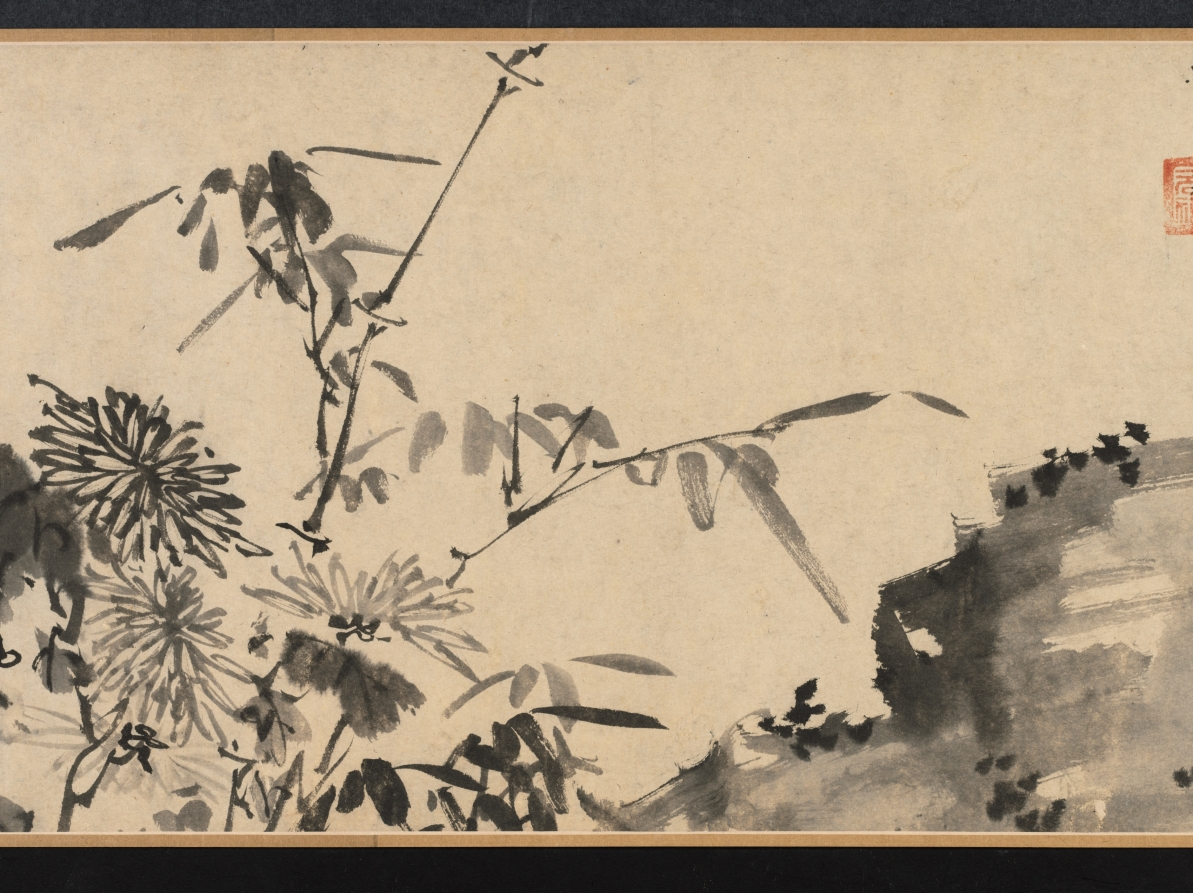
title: Chrysanthemums and Cabbage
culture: China, Ming dynasty (1368–1644)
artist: Tao Cheng (Chinese, active c. 1471–after 1502)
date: c. 1486 or before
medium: handscroll, ink and slight color on paper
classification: Painting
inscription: Artist's seal at beginning of painting: Yun hu 雲湖. Title by Wang Wenzhi 王文治 (1730–1802), date 1756. 2 seals of Wang Wenzhi 王文治 (1730-1802); 3 seals of Ku Yün (n. d.)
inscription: Section A (Chrysanthemums): 1 poem and 1 seal of Zhang Yuanzhen 張元禎 (1437–1507) - Jinshi, 1461; 1 poems and 3 seals of Ni Yue 倪岳 (1444–1501) - Jinshi, 1464; 1 poems and 2 seals of Zhao Xiang 趙祥 (life dates unknown) - Jinshi, 1469; 1 poems and 1 seals of Wu Xixian 吳希賢 (1437–1489) - Jinshi, 1464; 1 poems and 1 seals of Lü Chang 呂㦂 (1449–1511) - Juren, 1471; 1 poems and 3 seals of Fu Han 傅瀚 (1435–1502) - Jinshi, 1464; 1 poems and 1 seals of Feng Jue 馮珏 (life dates unknown) - Jinshi, 1478.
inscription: Chrysanthemums section, poem 1, by Zhang Yuanzhen 張元禎 (1437–1507): Several bushes of chrysanthemums grow in front of the Five-Willow Cottage,/ The yellow ones are really yellow and the white ones white./ This affable and decent fellow, young in years and unsophisticated,/ Has snapped one of the branches to dip in ink. (The Five-Willows Cottage was the home of the poet Tao Qian 陶潛 (Tao Yuanming 陶淵明, AD 365-427).) Chrysanthemums section, poem 2, by Ni Yue 倪岳 (1444–1501): Where at the Eastern Fence can you grieve for the Soul of the Xiang River?/ A man of upright character is mourned within the traces of ink./ White jade with a slight flaw would be a grievance forever,/ Later men should understand why even the roots of the flowers are washed. (Eastern Fence refers again to the poet Tao Qian 陶潛, while the Soul of the Hsiang River refers to the poet Qu Yuan 屈原 (c. 340–278 BC).) Chrysanthemums section, poem 3, by Zhao Xiang 趙祥 (life dates unknown): A clump of chrysanthemum grows in front of the bamboo pavilion,/ The winds of many autumns have blown since we parted beyond the river./ Straining wine through the official's cap of Tao [Qian] to prolong autumn's pleasures,/ The mists and clouds of ten thousand miles belong to the intoxicated. Chrysanthemums section, poem 4, by Wu Xixian 吳希賢 (1437–1489): It is a different spring if mulberry is planted during the latter part of the year,/ The dust of the world originally did not drop on clothing./ Who spills out ink under the Eastern Fence/ And paints so freely this portrait of chrysanthemums for the venerable Sir Tao? Chrysanthemums section, poem 5, by Lü Chang 呂㦂 (1449–1511): This full tray of ink for painting [flowers] at the Eastern Fence;/ Their whiteness or yellowness is not essential in capturing their beauty./ I don't have to go to Jiangnan to see them myself./ At my old house grow two or three branches. Chrysanthemums section, poem 6, by Fu Han 傅瀚 (1435–1502): Who daubed autumn flowers with ink/ As if they were dark dew on a branch tip only vaguely seen at evening?/ After the lazy clouds disperse, no one paints;/ A certain unconventionality pervades this painting. Chrysanthemums section, poem 7, by Feng Jue 馮珏 (life dates unknown): To satisfy his hunger, [the chrysanthemums] have at times entered the poetry of Qu Yuan;/ Taking up the wine cup, it felt close to Tao Qian./ [With them I am like] a lonely root sustained by deep water/ Or an old man to whose hair the color of youth returns.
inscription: Section B (Cabbage): 1 poem and 1 seal of Cai Qi 蔡圻 (life dates unknown) - degree information not known; 1 poems and 3 seals of Ni Yue 倪岳 (1444–1501) - Jinshi, 1464; 1 poem and 3 seals of Jiao Fang 焦芳 (1436–1517) - Jinshi, 1464; 1 poem and 3 seals of Li Dongyang 李東陽 (1447–1516) - Jinshi, 1464; 1 poems and 1 seals of Wu Xixian, signed “Xixian” 吳希賢 - Jinshi, 1464; 1 poems and 3 seals of Fu Han 傅瀚 (1435–1502) - Jinshi, 1464; 1 poems and 1 seals of Lü Chang 呂㦂 (1449–1511) - Juren, 1471; 1 poems and 2 seals of Zhao Xiang 趙祥 (life dates unknown) - Jinshi, 1469; 1 poems and 1 seals of Feng Jue 馮珏 (life dates unknown) - Jinshi, 1478.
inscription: Cabbage section, poem 1, by Cai Qi 蔡圻 (life dates unknown): The ink splashes are fresh from a frosty brush dipped in pond water;/ I can visualize that time when Yunhu 雲湖 [Tao Cheng] first showed his talents./ I lament the places where I scribbled before,/ Who would open them to inscribe a poem? (The first line is an allusion to the famous Jin dynasty calligrapher Wang Xizhi 王羲之 (AD 303-361), who practiced calligraphy so diligently at the edge of a pond that the water turned black with ink.) Cabbage section, poem 2, by Ni Yue 倪岳 (1444–1501): After rain the vegetables begin to grow;/ How are the colors of the masses lately!/ Once you get used to them, the tastiest parts are the ends of the roots;/ I don't know if they can be used for "seasoning soup." ("Seasoning soup" is an allusion to the statesmanship of a chief minister.) Cabbage section, poem 3, by Jiao Fang 焦芳 (1436–1517): This crop of purple stalks and green leaves is late and irregular;/ Now the rainy season is over for the Eastern Garden./ All the nobles nowadays dine on meat;/ Who of them knows the flavor of this [cabbage]. Cabbage section, poem 4, by Li Dongyang 李東陽 (1447–1516): It's always helped the honest man to sober up after drinks./ I intend to go to the deepest part of the stream-crossed garden/ To refresh myself in the fragrance and dew of evening. Cabbage section, poem 5, by Wu Xixian 吳希賢 (1437–1489): After rain, the white silk is filled with fragrant vegetables;/ How many times this happens in Mr. Tao's paintings./ On whom will you depend to present a memorial to the ruler?/ Don't let this color emerge on the faces of the people. (The last line is meant as a warning to officials: the color of the vegetables (green) may be pleasing in itself, but when it emerges on the faces of the starving poor, it signifies a badly governed world.) Cabbage section, poem 6, by Fu Han 傅瀚 (1435–1502): For twenty years I have feasted on the excellent mutton of an official;/ Yet I talk and dream about the garden and its vegetables./ Do not merely say it is good to chew the root of the cabbage--/ You must taste to understand what poverty is. Cabbage section, poem 7, by Lu Chang 呂㦂 (1449–1511): The capital is never a place for an apprentice in the "garden of scholarship."/ Who would write about gardens and vegetables on an examination paper?/ I've walked throughout the country in spring;/ Make sure the people don't show this color. Cabbage section, poem 8, by Zhao Xiang 趙祥 (life dates unknown): After a wash of rain, the spring garden is still in order;/ The flavor [of the cabbage] is more suitable with a small drink and the hum of a tune./ The rich and powerful in their mansions consume dish after dish of meat;/ Vegetarian food is known only by the scholars. Cabbage section, poem 9, by Feng Jue 馮珏 (life dates unknown): A new cabbage is nourished with dew;/ It takes a long time to grow and mature./ The business of "seasoning the soup" is your responsibility;/ Better command the gardener to take care [of the cabbages]. trans. HK/LYSL/WKH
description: On an autumn day in Beijing, Tao Cheng had a gathering with a group of scholar-officials and created two paintings in a spontaneous, casual style. The first depicts chrysanthemums, slender bamboo stalks, and a rock in monochrome ink. Tao applied light colors for the second painting that depicts cabbage. Tao deliberately placed the images on the first sections of the paper so that his honorable guests could add their poetic inscriptions inspired by his imagery. In the first section to the right, all seven poetic inscriptions refer to the beloved poet and recluse Tao Qian (also called Tao Yuanming, AD 365–427) who was particularly known for his profound love for chrysanthemum flowers. Most of the inscriptions in the second section express sympathy for the poor, since cabbage is the main ingredient in their humble food. Taken together, the poems and paintings allude to the life and responsibilities of the scholar-official: the importance of both an upright character and a concern for the poor citizens in order to achieve good government.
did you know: Eminent calligrapher Wang Wenzhi 王文治 was only 27 sui when he wrote the title in 1756.